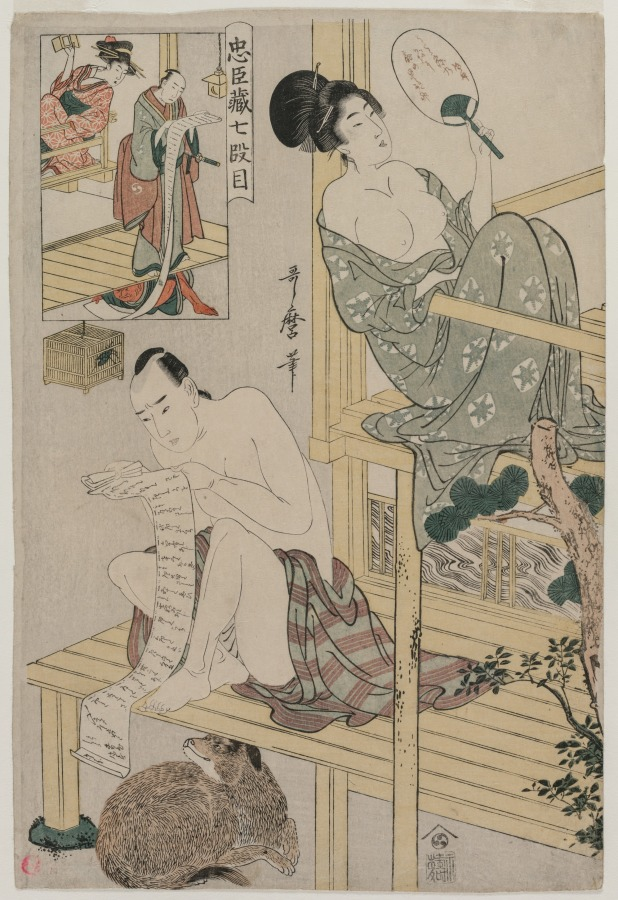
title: Act VII from the series The Storehouse of Loyal Retainers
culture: Japan, Edo period (1615–1868)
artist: Kitagawa Utamaro (Japanese, c. 1754–1806)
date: c. 1801–2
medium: Color woodblock print; ink and color on paper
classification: Print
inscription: Signature: Utamaro hitsu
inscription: Publisher: Nishimuraya Yohachi (Eiju han, emblem)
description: This series gives a famous play a humorous spin by altering the setting and some parts of the narrative. Utamaro kept his jokes accessible by picturing the action of the original episode to the side of the main image for easy reference. In this print, a spy reading a letter is turned into a dog; both can be pronounced inu in Japanese. In the stage version of this scene, the loyal samurai Oboshi Yuranosuke reads an important letter relating details of the plot to avenge the unjust death of his master. The spy Kudayu also reads the note as it unrolls beneath the veranda. On the balcony, the jealous courtesan Okaru believes it to be a love letter from a rival. Utamaro transforms the spy/counterspy episode into a humorous scene on a warm night. A beau reads a love letter, its presence disturbing the dog lying underneath the veranda. On the balcony above, a bored courtesan shows no interest in the scene below as she fans herself to keep cool.